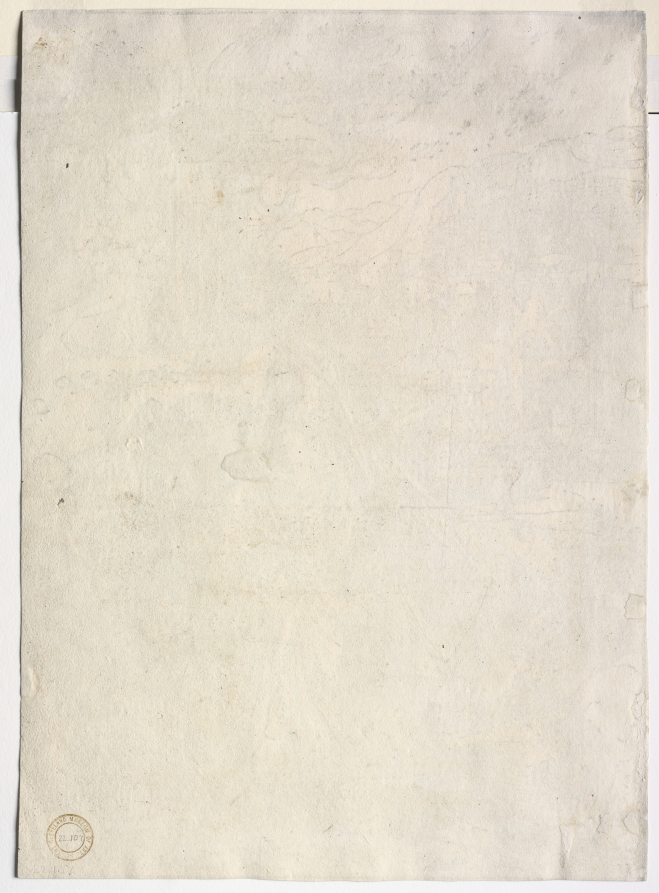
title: Revelation of St. John: Angel with the Key of the Bottomless Pit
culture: Germany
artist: Albrecht Dürer (German, 1471–1528)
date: 1511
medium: woodcut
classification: Print